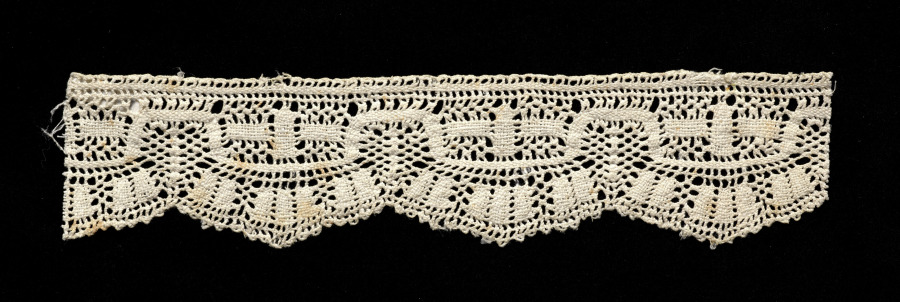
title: Lace Edging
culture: Italy, Abruzzi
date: 1700s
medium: Bobbin lace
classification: Lace